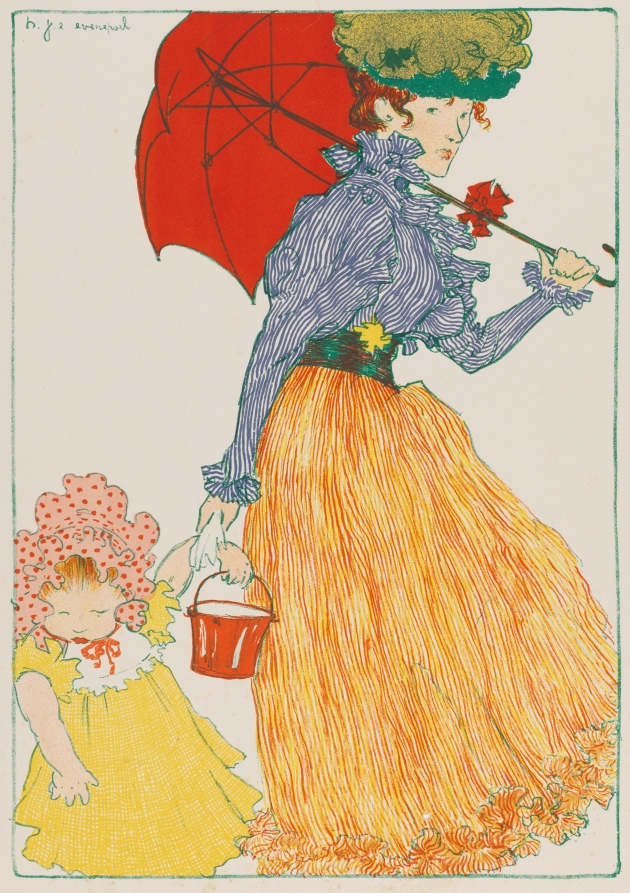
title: In the Square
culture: Belgium, 19th century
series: published in L'Estampe Moderne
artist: Henri Evenepoel (Belgian, 1872–1899)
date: 1897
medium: color lithograph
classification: Print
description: Evenepoel was born in Belgium but moved to Paris around 1890 and tragically died at the age of 27. In the Square was his only major print and was issued by L’Estampe Moderne (The Modern Print), a publication that released monthly portfolios of original prints in editions of 150. Such publications, which proliferated during the 1890s, helped popularize printmaking.